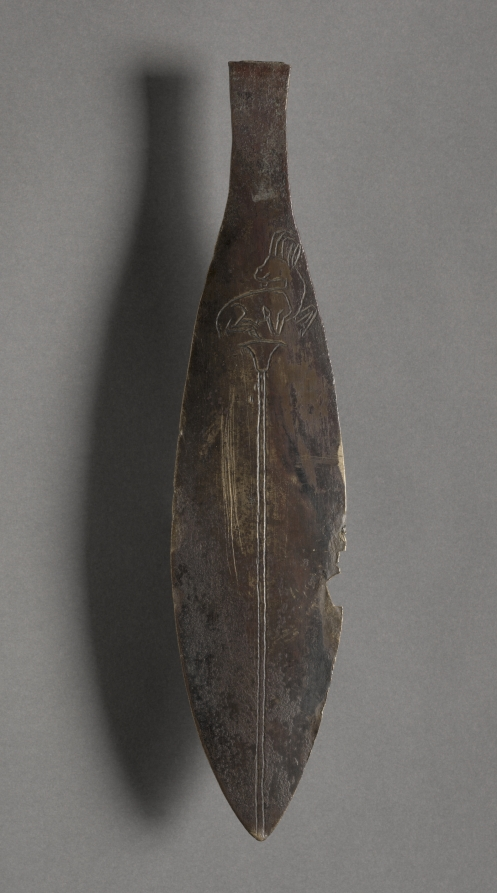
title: Dagger Point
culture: Egypt, New Kingdom (1540–1069 BCE), Dynasty 18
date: 1540–1296 BCE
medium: bronze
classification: Implements